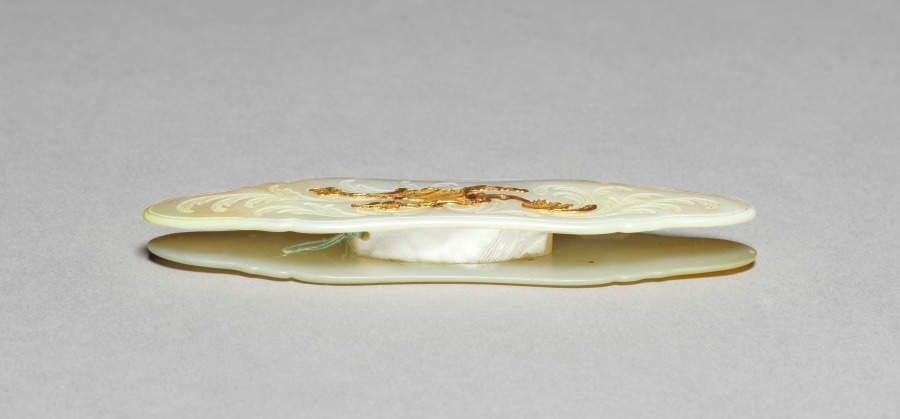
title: Tatting Bobbin from a Sewing Box (Nécessaire)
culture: Austria, possibly Vienna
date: c. 1765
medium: gold and mother-of-pearl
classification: Miscellaneous